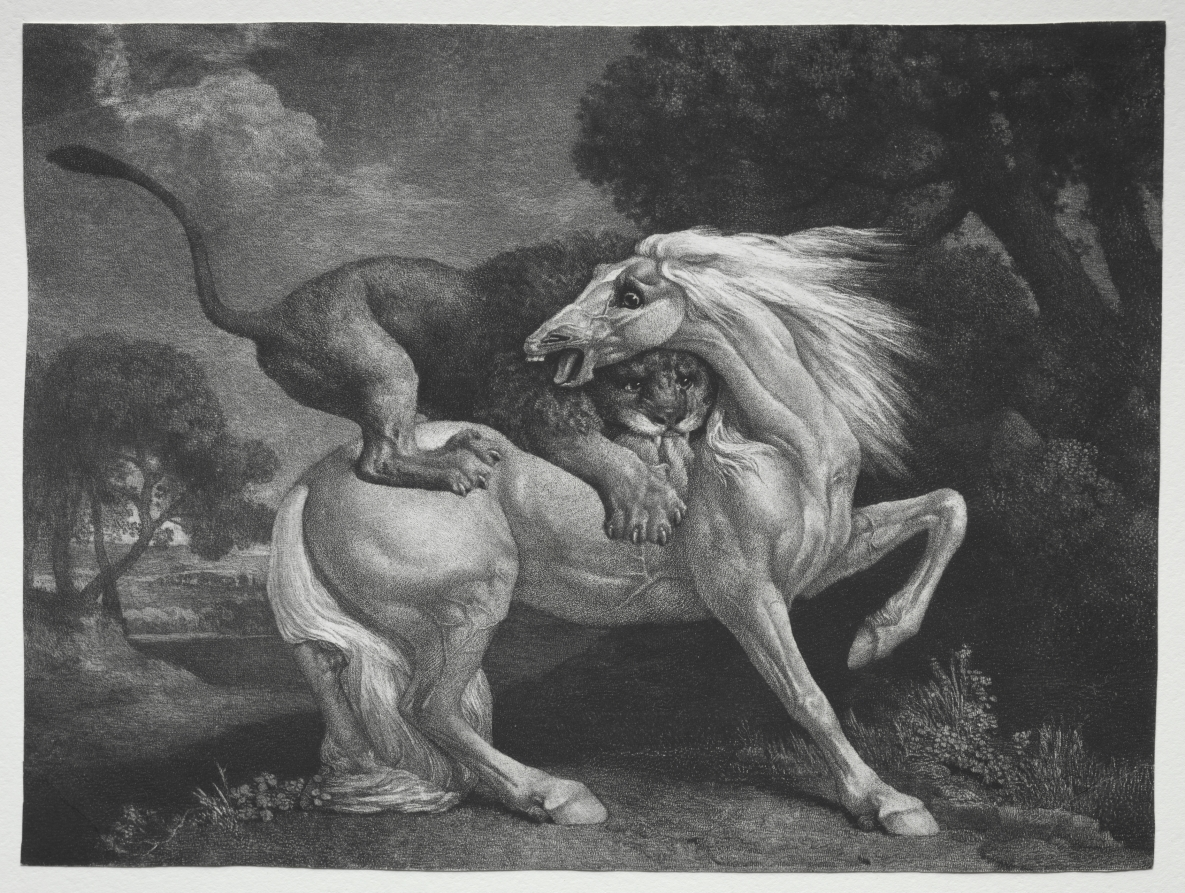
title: A Horse Attacked by a Lion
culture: England, 18th century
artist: George Stubbs (British, 1724–1806)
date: 1788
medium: etching and engraving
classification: Print